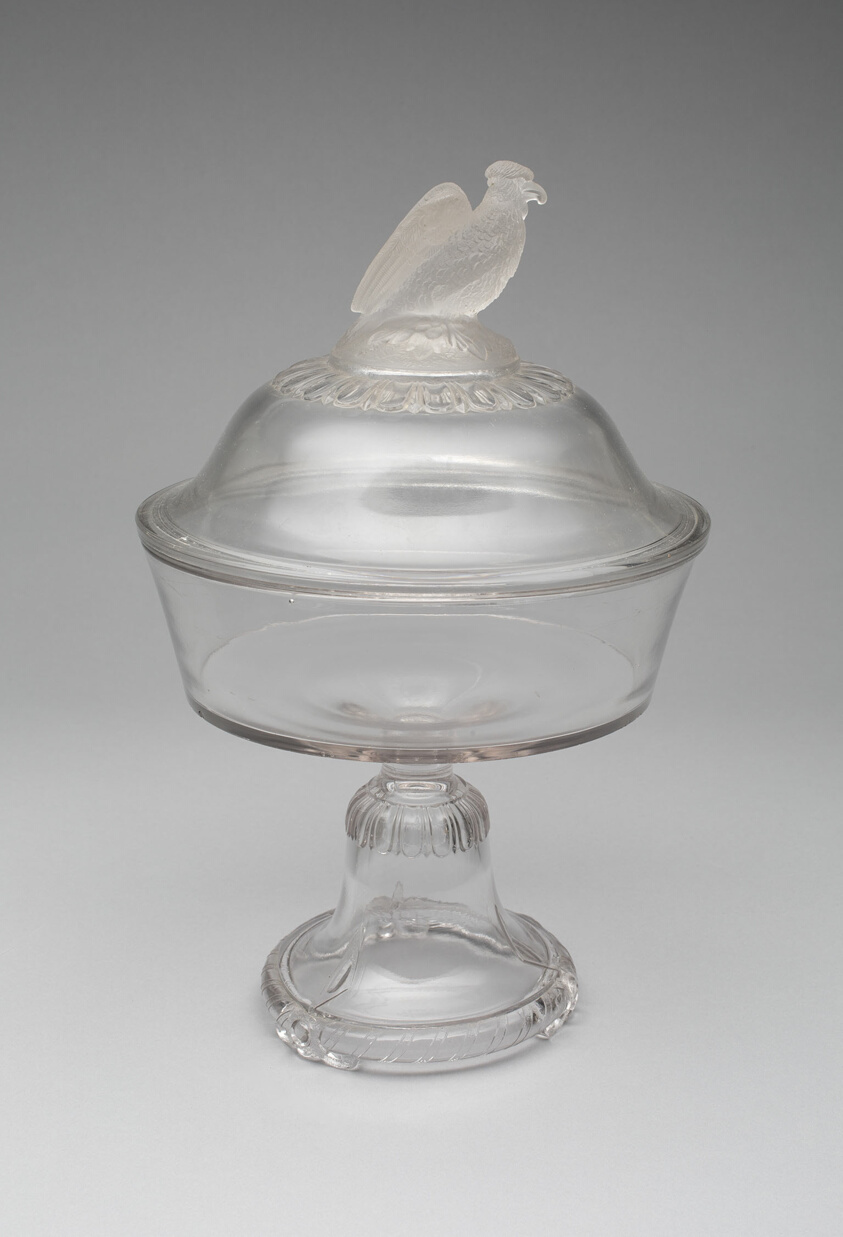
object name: Glass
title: "Old Abe"/Frosted Eagle pattern compote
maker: Attributed to the Crystal Glass Company; American, 1870–1888; Bridgeport, Ohio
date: 1880–90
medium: Glass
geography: Ohio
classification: compote; glass; vessel for serving food; american decorative arts; american arts; decorative arts